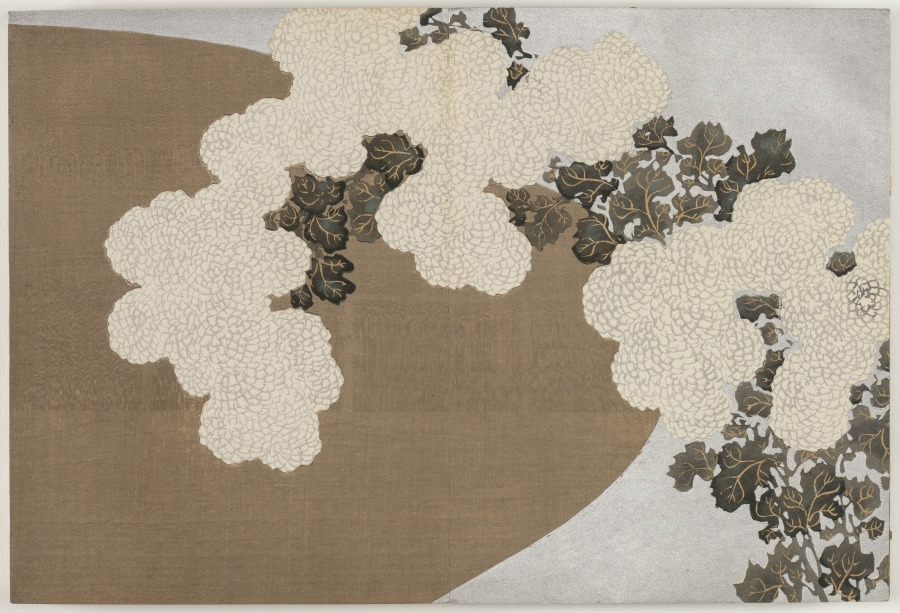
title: Flowers of a Hundred Worlds (Momoyogusa): Chrysanthemums (Momoyogusa)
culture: Japan, Meiji period (1868–1912)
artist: Kamisaka Sekka (Japanese, 1866–1942)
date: 1909–10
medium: color woodcuts with gold and silver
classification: Bound Volume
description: This print from a set of three woodblock printed albums displays the graphic design prowess of Kamisaka Sekka. The images were first distributed one by one to subscribers to the series but later were reissued in bound form, like this book, for mass consumers. Each print features a vignette taken from nature or Japanese literature. Many of the scenes have a long history in Japan, originating in the 900s or 1000s and having been interpreted by all manner of artists since that time. Sekka’s selections hew closely to precedents from the Rinpa style originated by painter Tawaraya Sōtatsu (c. 1570–c. 1640) and calligrapher Hon’ami Kōetsu (1558–1637).